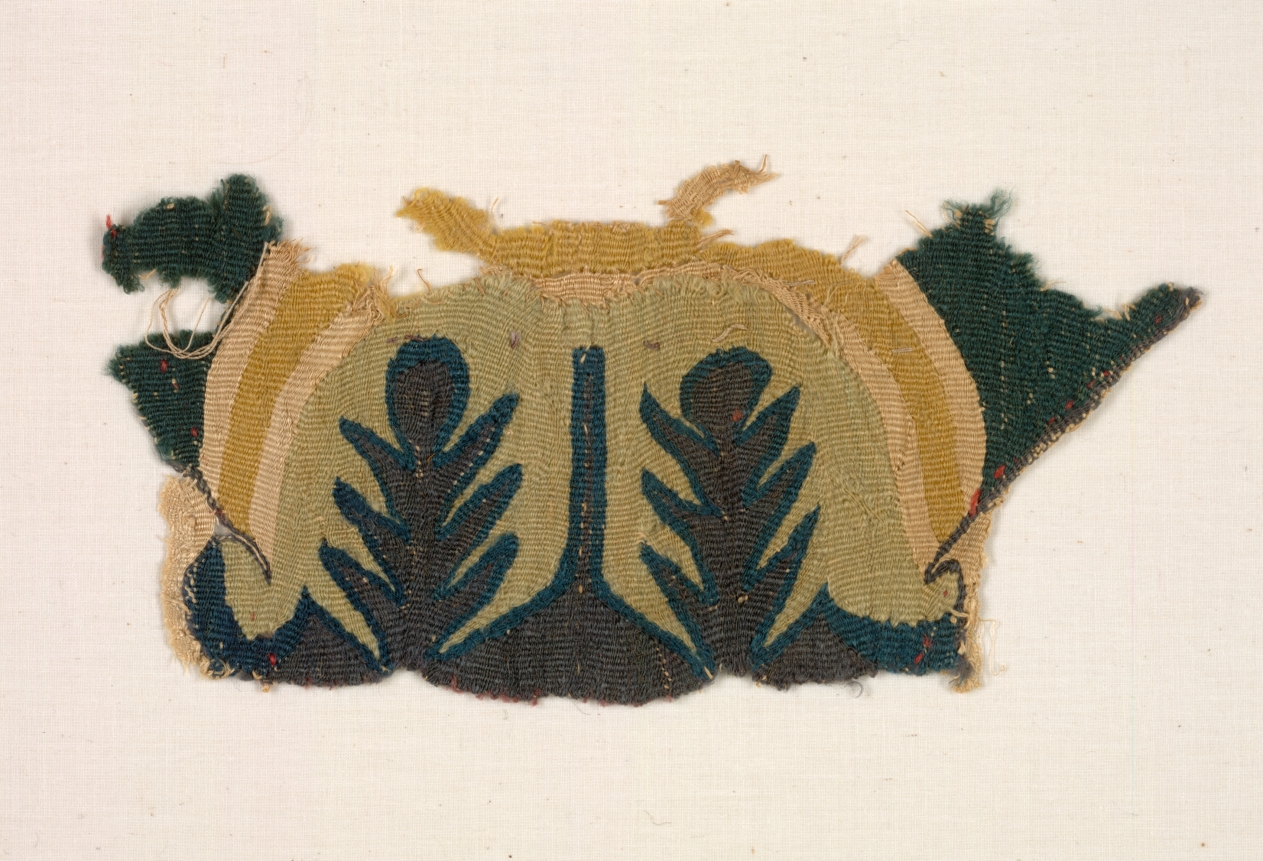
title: Fragment with Abstracted Leaves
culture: Egypt, Byzantine period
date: 500s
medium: tabby weave with inwoven tapestry ornament, linen and wool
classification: Textile